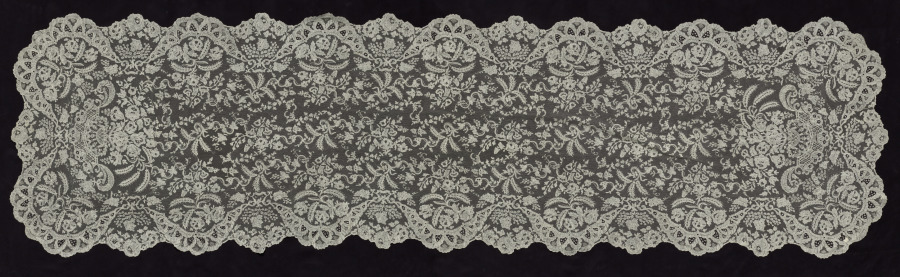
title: Lace Scarf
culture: France, Lille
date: late 1800s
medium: Linen: bobbin lace (blonde lace)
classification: Lace